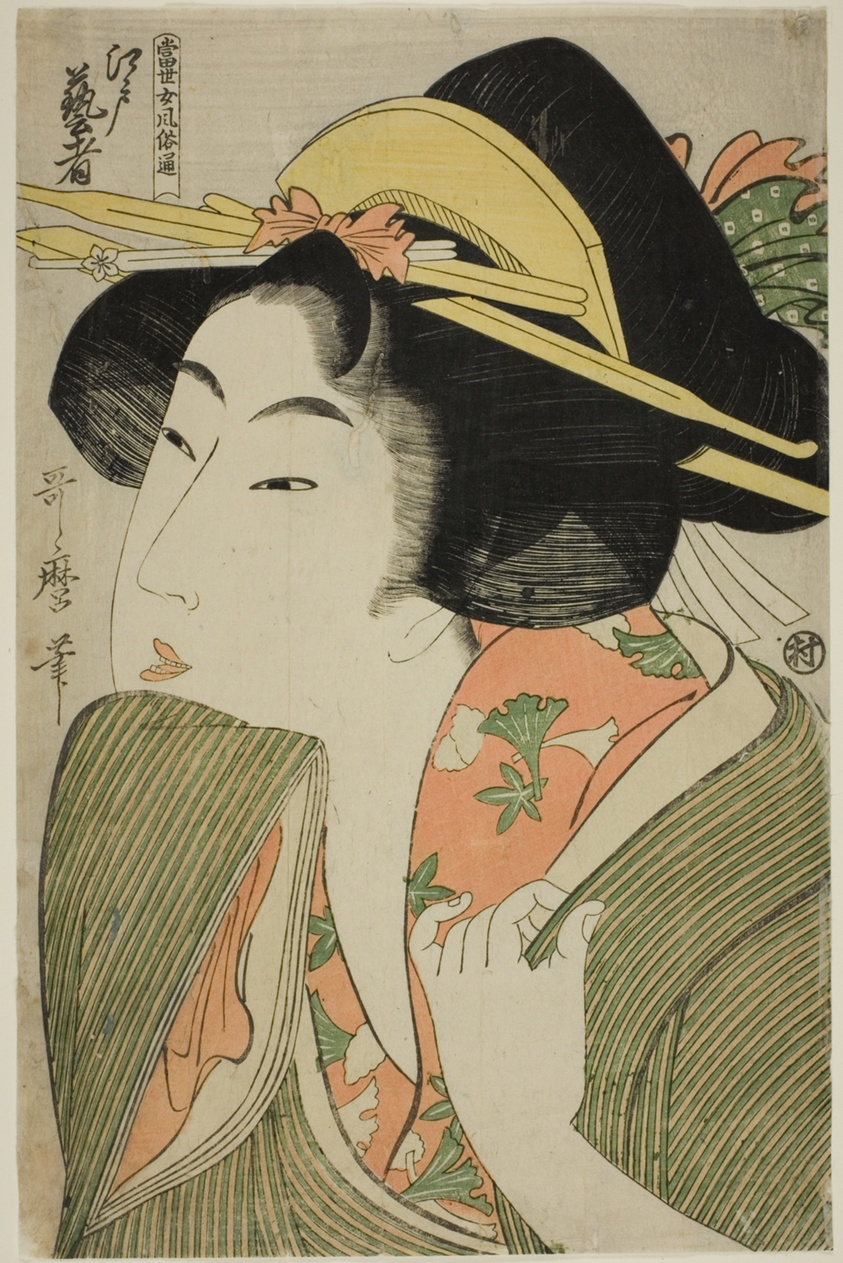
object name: Print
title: Edo Geisha, from the series "A Guide to Women's Contemporary Styles (Tosei onna fuzoku tsu)"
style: Japanese (culture or style)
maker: Kitagawa Utamaro 喜多川 歌麿; Japanese, 1753 (?)-1806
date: c. 1801/02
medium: Color woodblock print; oban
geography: Japan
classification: woodblock print; print; asian art